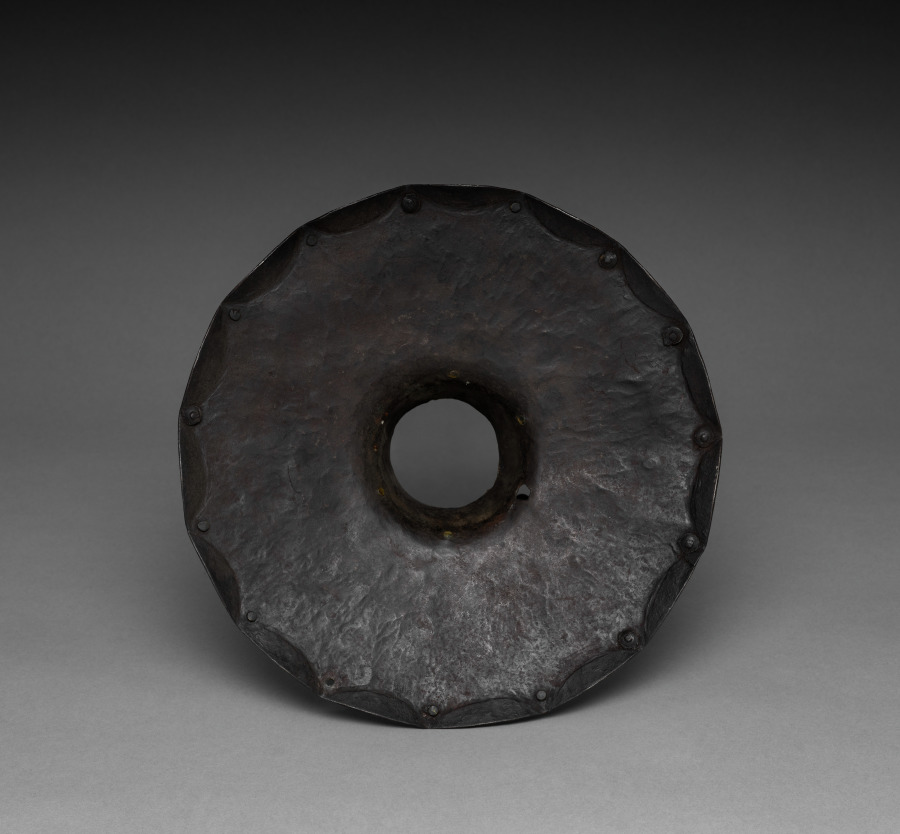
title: Vamplate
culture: Germany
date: 1500s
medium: steel with scalloped edge; brass rivets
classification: Arms and Armor